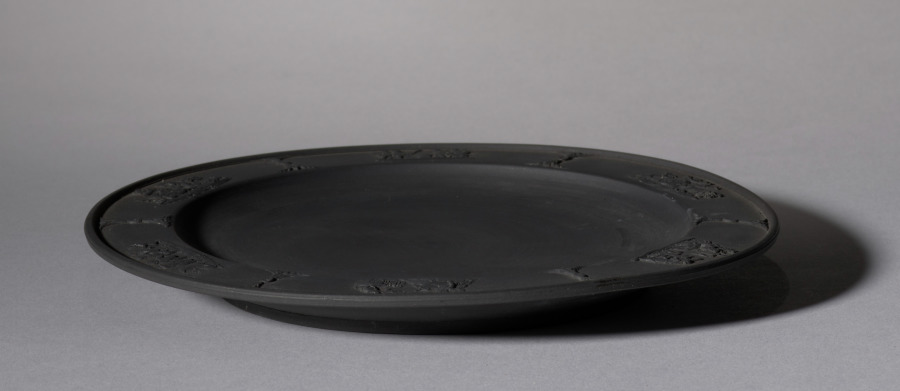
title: Small Plate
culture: England, Staffordshire, 19th century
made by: Wedgwood Factory (British)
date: 1800s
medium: black basalt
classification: Ceramic